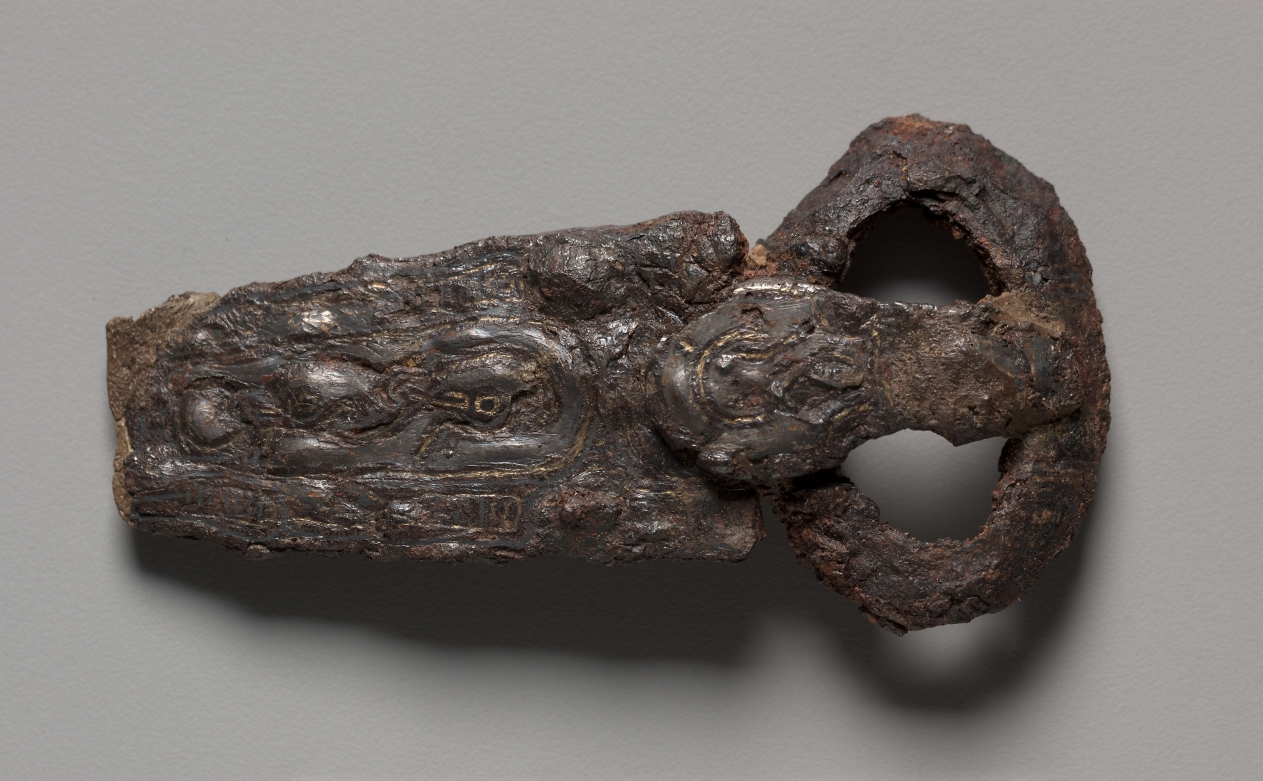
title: Buckle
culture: Merovingian, Burgundian, Migration period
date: 600s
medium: iron with silver overlay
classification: Jewelry